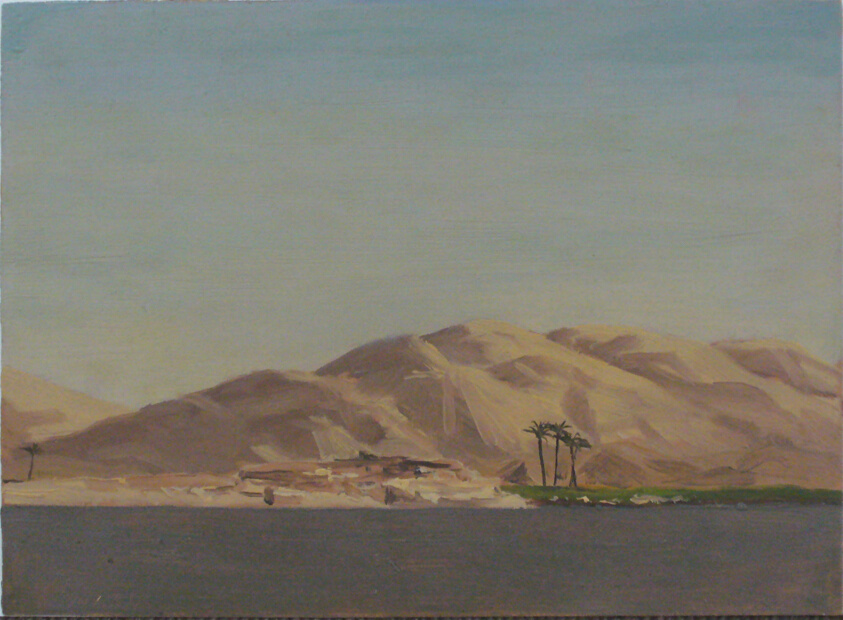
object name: Drawing and Watercolor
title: Four Palms on Verdant Field Near Nile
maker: Lockwood de Forest (American, 1850-1932)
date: January 4, 1876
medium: Oil on card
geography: United States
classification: drawings (visual works); prints and drawing